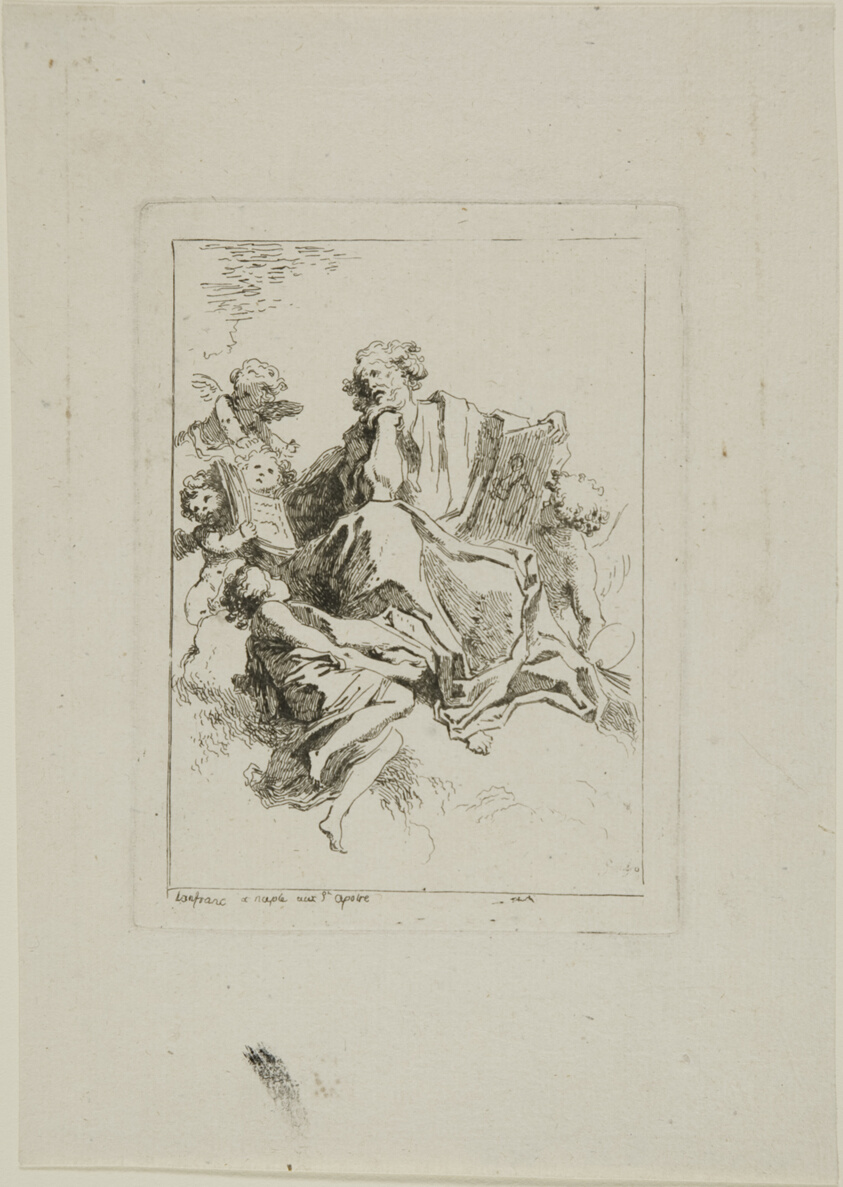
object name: Print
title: Saint Luke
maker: Jean-Honoré Fragonard (French, 1732-1806); after Giovanni Lanfranco (Italian, 1582-1647)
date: 1763/64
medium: Etching on ivory laid paper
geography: France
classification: prints and drawing; etching; print